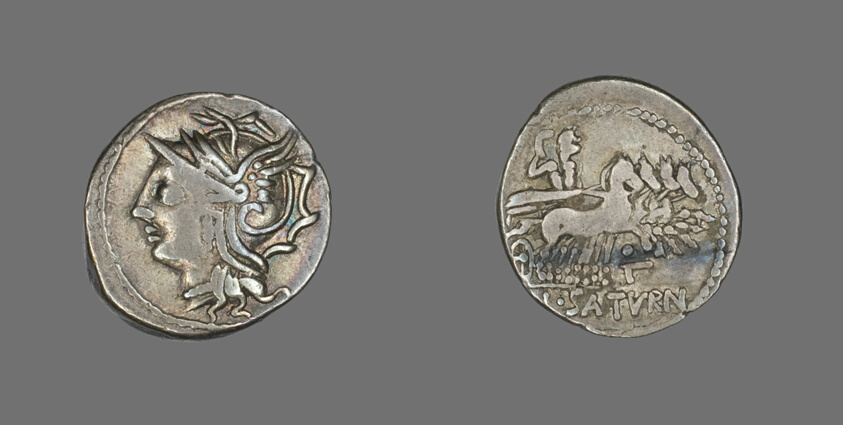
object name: Coin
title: Denarius (Coin) Depicting the Goddess Roma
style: roman (ancient, style or period), ancient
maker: Roman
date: 104 BCE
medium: Silver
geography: Roman Empire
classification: coin; ancient art